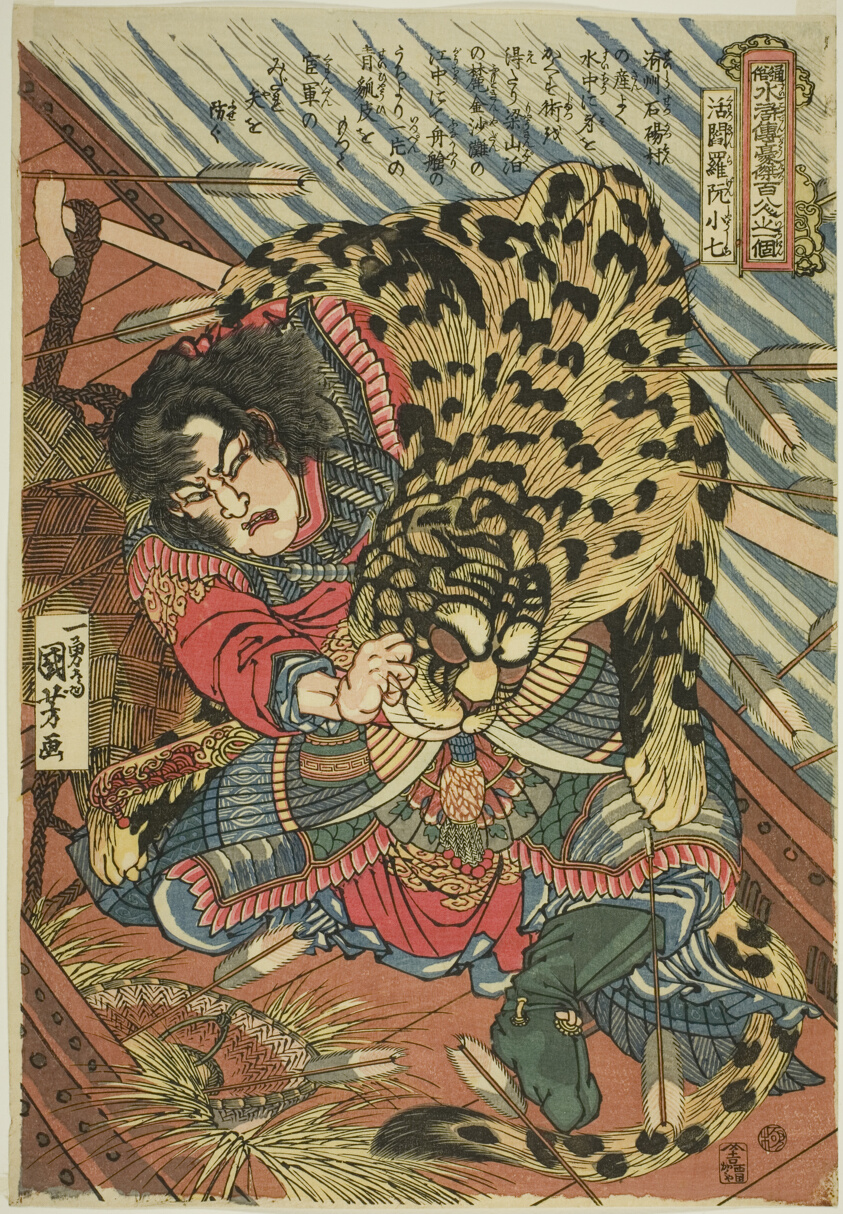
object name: Print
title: Rua Xiaoqi (Katsuenra Genshoshichi), from the series "One Hundred and Eight Heroes of the Popular Water Margin (Tsuzoku Suikoden goketsu hyakuhachinin no hitori)"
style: Japanese (culture or style)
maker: Utagawa Kuniyoshi (Japanese, 1797-1861)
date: c. 1827/30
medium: Color woodblock print; oban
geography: Japan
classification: woodblock print; print; asian art